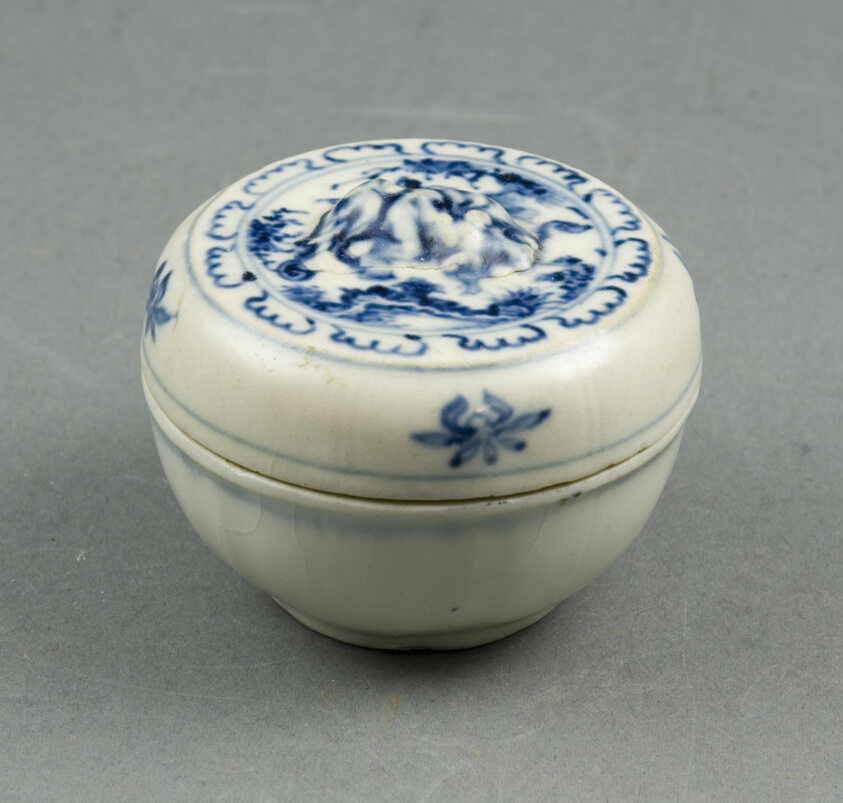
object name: Vessel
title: Miniature Covered Box with Knob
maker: Vietnam, near Hoi An, Offshore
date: Late 15th/early 16th century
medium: Glazed stoneware with cobalt-blue underglaze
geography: Vietnam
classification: miniature; vessel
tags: blue (color)